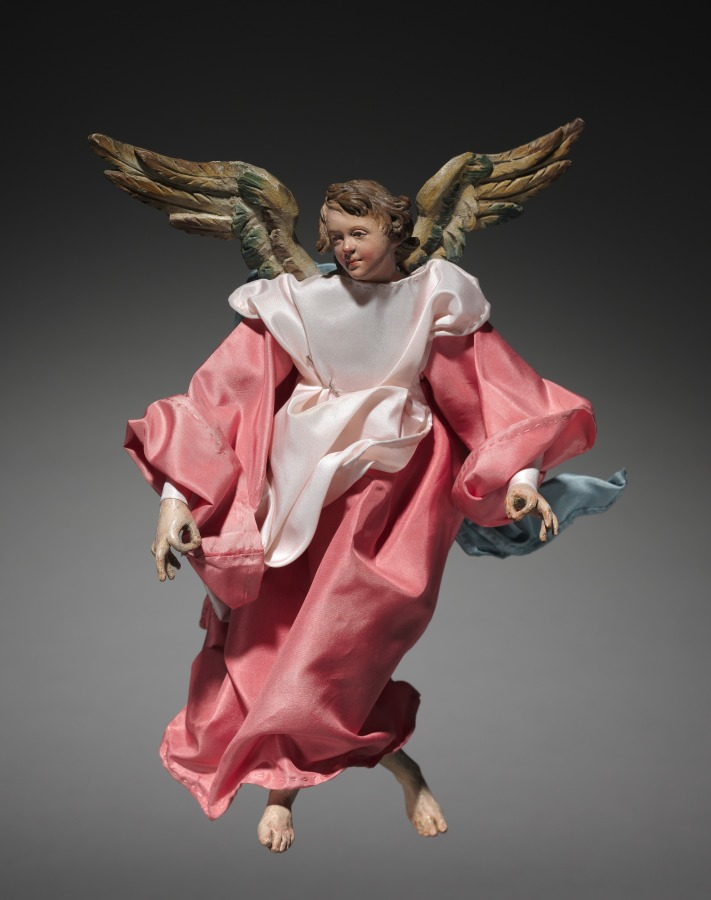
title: Figure from a Crèche: Angel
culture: Italy, Naples, late 18th-early 19th century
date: 1780–1830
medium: painted wood and terracotta with various textiles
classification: Sculpture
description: The practice of creating scenes of the Nativity for the home dates from the early 1700s in Italy, where people began to set up doll-like figures of about a foot or less in height. The custom was particularly popular in Naples around 1800, where crèche scenes (crèche means cradle, or crib) included many figures, whose heads and hands of painted terracotta, stuffed cloth bodies, and clothing adapted from contemporary local costumes gave them an amazingly realistic character. Representations of the birth of Jesus can be traced to the first few centuries of Christianity. Both living creatures and sculptural depictions of them were used from early times. By the late middle ages it was customary to create life-size figures of wood or stone, naturalistically painted, to represent the characters who participated in the events of Jesus's early life. These sculptures were then arranged in scenes illustrating one or both of the most important of these events, the Adoration of the Shepherds and the Adoration of the Magi-the three kings from the East who came to pay homage to the Christ child. Used in churches, these large figures were especially popular in Italy, Central Europe, Spain, and Portugal. This Object in Focus presentation was organized by Henry Hawley, Curator of Renaissance and Later Decorative Arts and Sculpture.